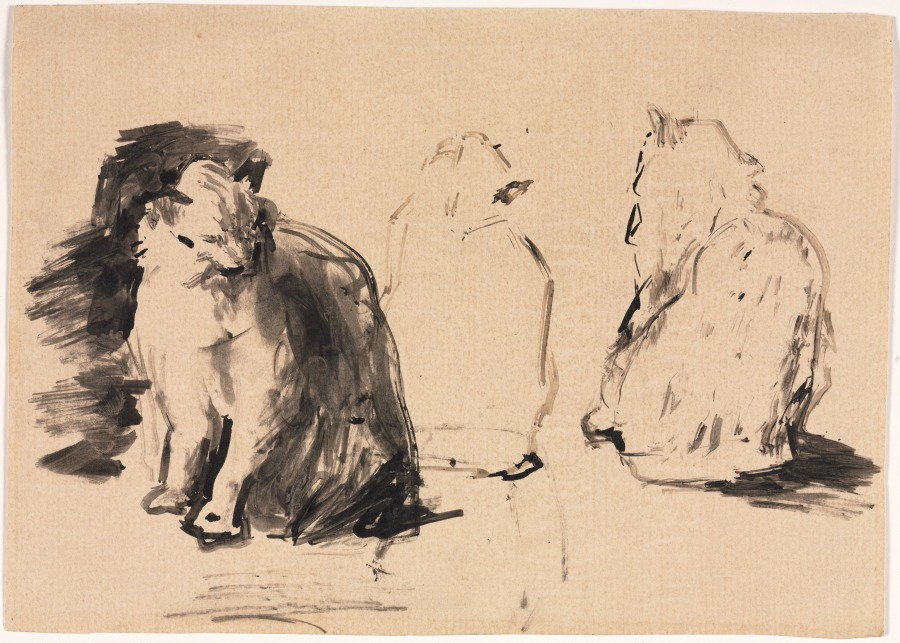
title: Cats (recto); Sketch of Two Figures Embracing (verso)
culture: France, 19th century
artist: Théodule Ribot (French, 1823–1891)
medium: pen and black ink and brush and black wash on paper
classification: Drawing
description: Drawing was an essential part of Théodule Ribot's practice and he often sketched his environs from life. As a realist artist, Ribot favored humble subjects taken from everyday life. This double-sided sheet was likely one that he reused for two disparate images: a cat viewed from three angles, perhaps in his studio, and what appears to be a sculpture of two figures embracing.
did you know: Théodule Ribot's son, Germain, was also a genre painter.